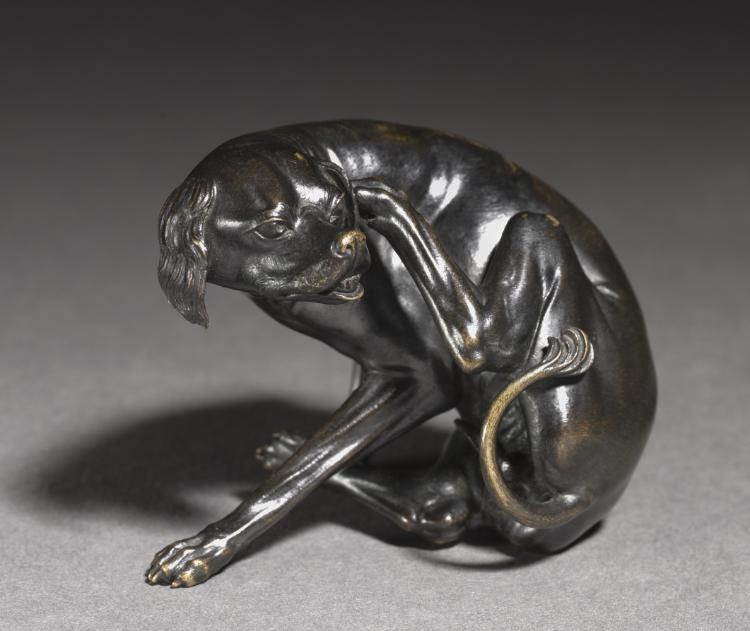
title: Sitting Dog Scratching Himself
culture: Southern Germany, possibly Nuremberg, 16th century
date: c. 1525–1530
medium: bronze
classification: Sculpture